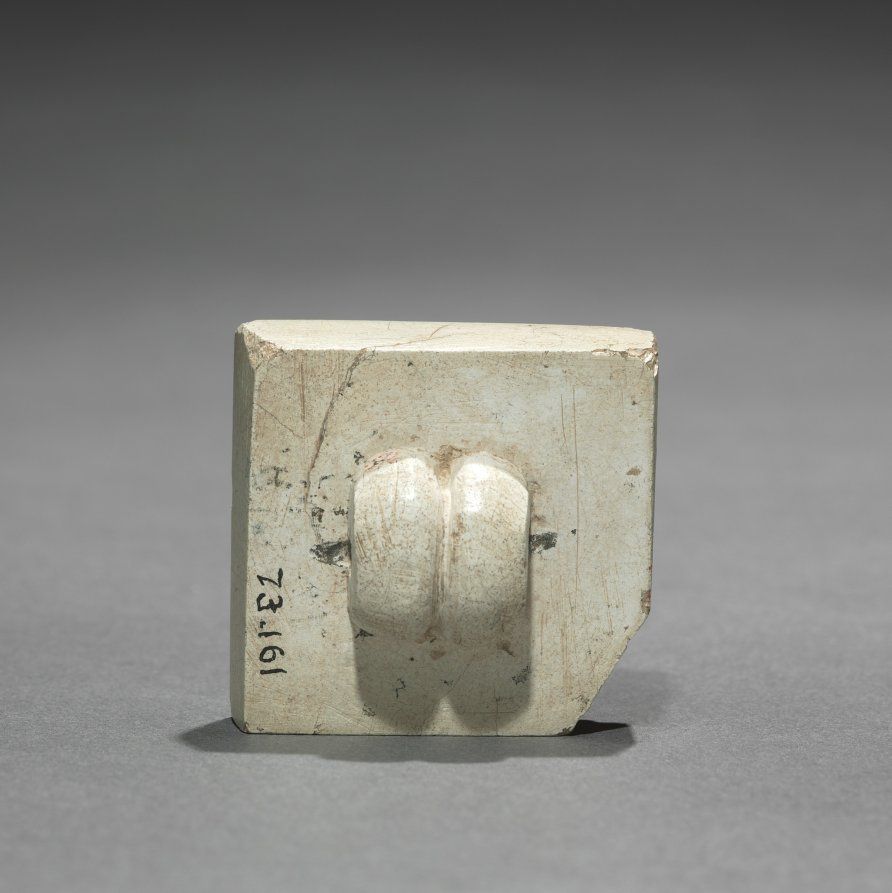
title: Seal with Unicorn and Inscription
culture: Pakistan, Indus Valley civilization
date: c. 2000 BCE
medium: steatite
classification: Seals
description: Indus Valley seals appear to have been hung on a string that passed through a boss on the reverse side. This animal, carved with detailed markings around his neck and forequarters, has his head positioned over an object on a stand that may be interpreted as an altar or brazier or censer; it is not known whether it is for offerings to or sacrifice of the animal.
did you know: Specialists disagree as to whether single-horned bovines actually lived during the time of the Indus Valley Civilization, four thousand years ago.